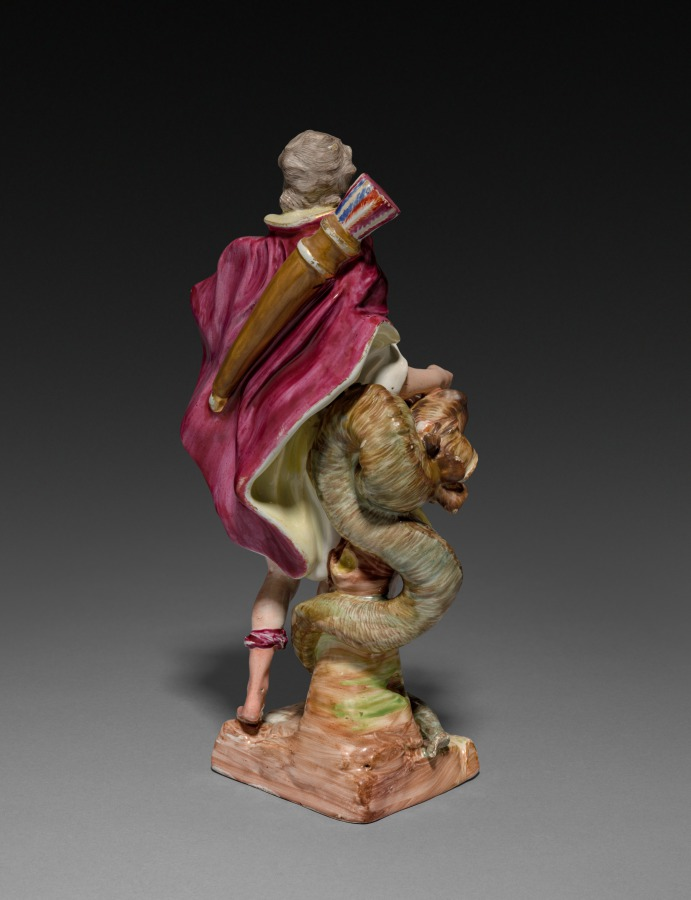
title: Classical Warrior with Serpent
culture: France, 18th century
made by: Sceaux Factory (French, active 1748–66)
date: c. 1770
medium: faience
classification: Ceramic